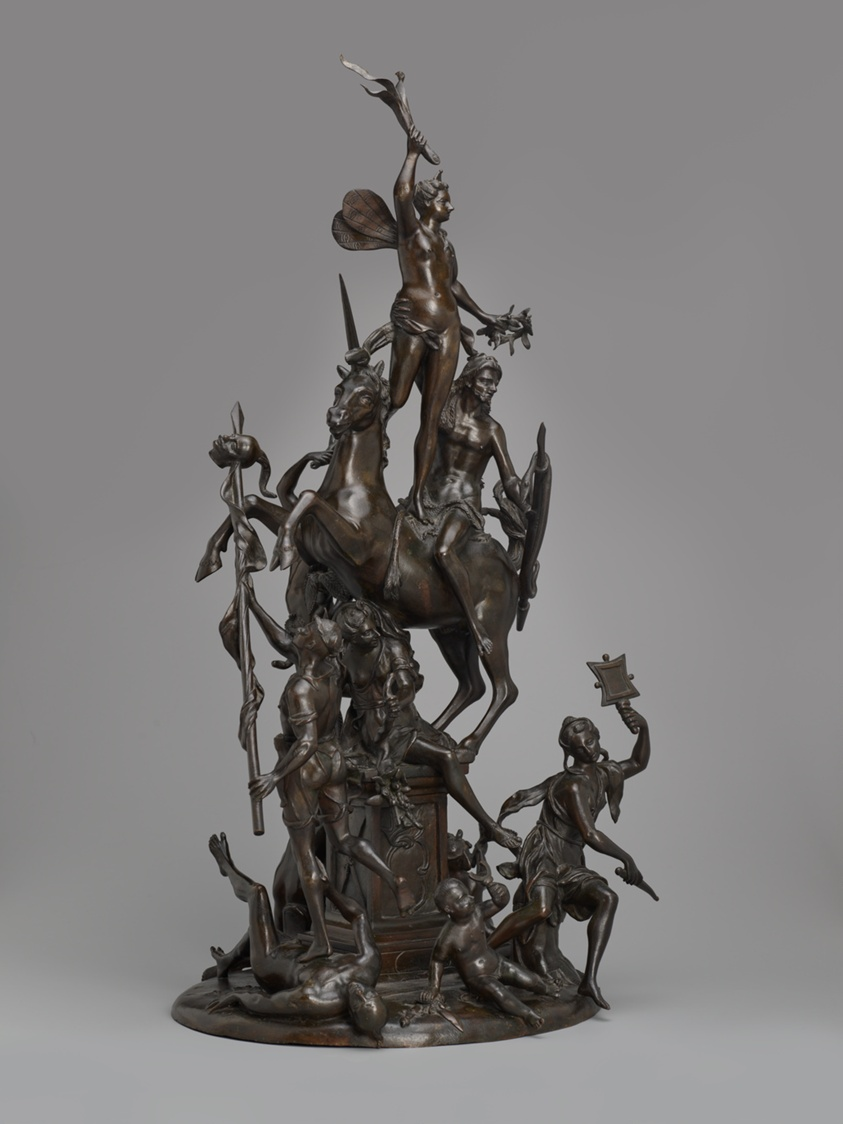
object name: Sculpture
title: Allegorical Group of Victory Supported by Valor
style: 18th Century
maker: Francesco Bertos (Italian, active c. 1693–1739)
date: 1700/10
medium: Bronze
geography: Italy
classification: statuette; Italian; sculpture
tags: victory, woman, weapons, unicorns, sculpture, nudes, mirror, men, laurel wreaths, head, crowns, children, animals